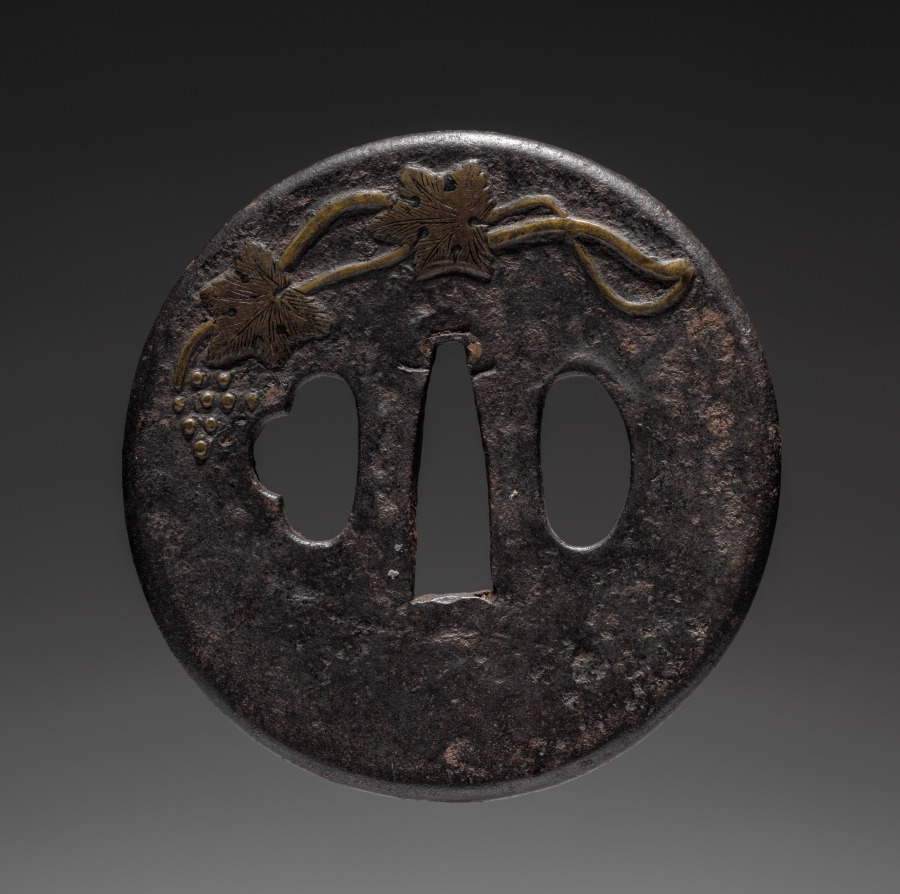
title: Sword Guard (Tsuba) with Grapevine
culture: Japan, possibly Edo period (1615-1868)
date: c. 1615–1868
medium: iron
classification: Arms and Armor